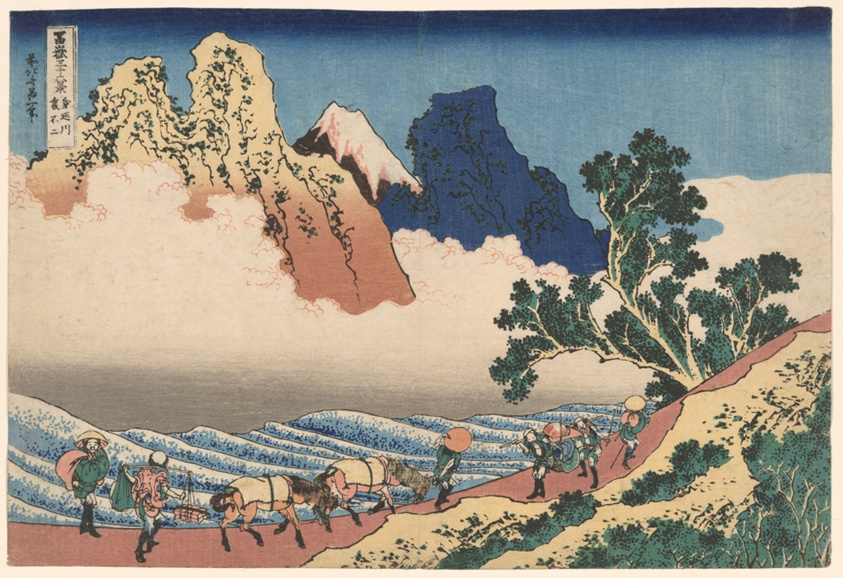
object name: Print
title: The Back of Mount Fuji Seen from Minobu River (Minobugawa Urafuji), from the series Thirty-Six Views of Mount Fuji (Fugaku sanjūrokkei)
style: Japanese (culture or style)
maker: Katsushika Hokusai 葛飾 北斎; Japanese, 1760-1849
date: 1830-33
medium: Color woodblock print; ōban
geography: Japan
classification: print; asian art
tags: landscapes